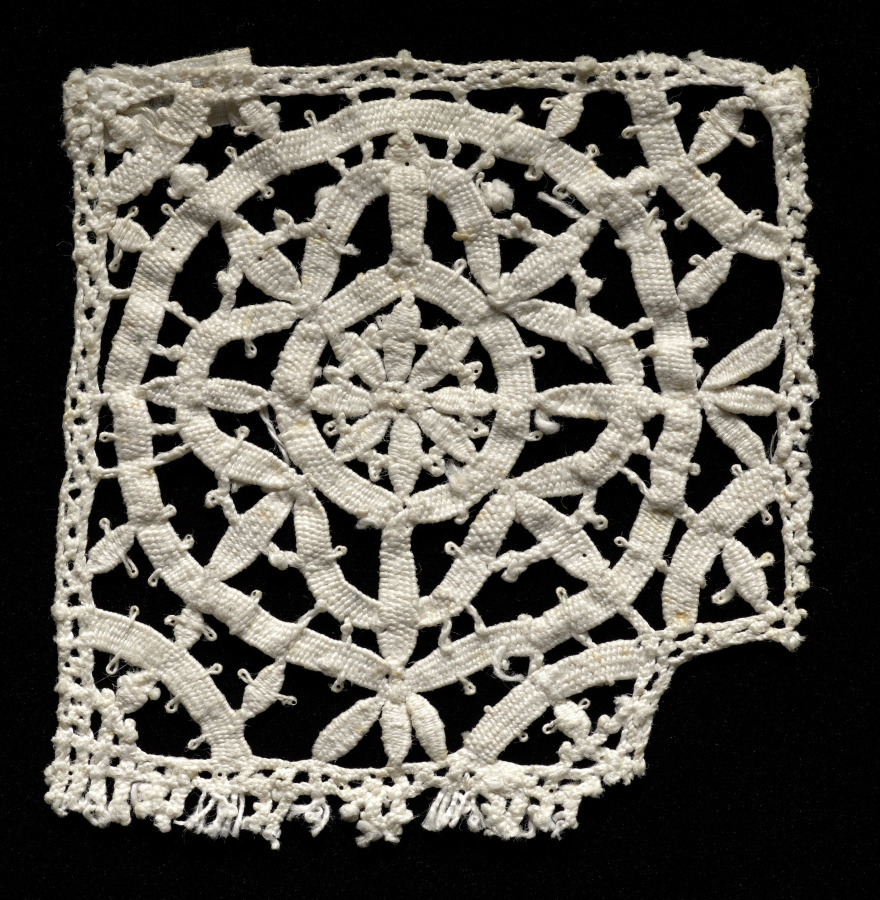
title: Lace Point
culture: Italy, Genoa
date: 1600–1620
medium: Bobbin lace (needle lace, reticella design)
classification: Lace